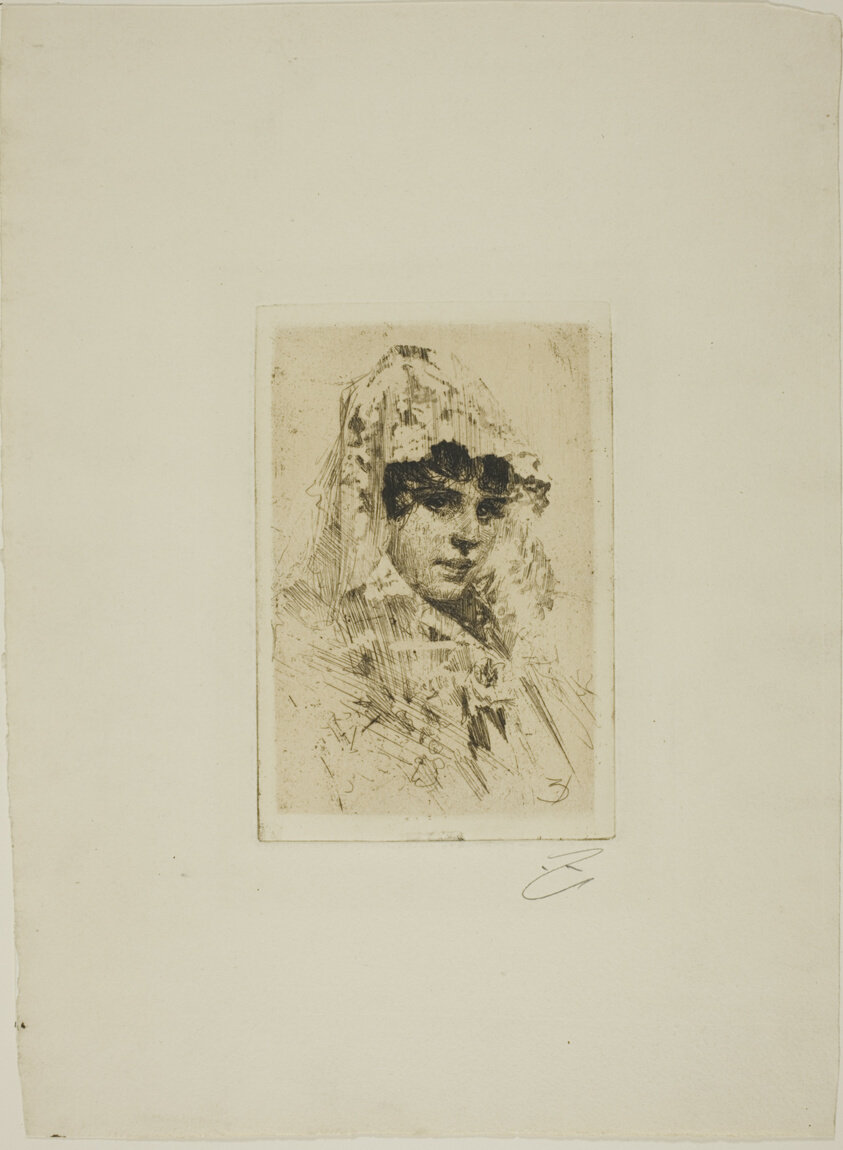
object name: Print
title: Spanish Woman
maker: Anders Zorn (Swedish, 1860-1920)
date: 1884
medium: Etching on ivory wove paper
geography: Sweden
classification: etching; print; prints and drawing